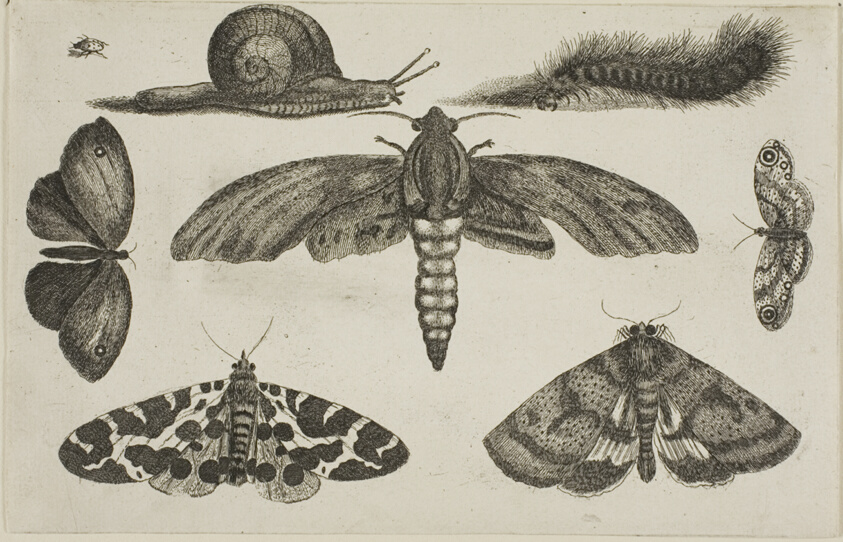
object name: Print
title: Six Insects, a Caterpillar, and a Snail, from Diversae Insectorum...Figurae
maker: Wenceslaus Hollar (Bohemian, 1607-1677)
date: after 1644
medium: Etching on ivory laid paper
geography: Bohemia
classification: etching; print; prints and drawing